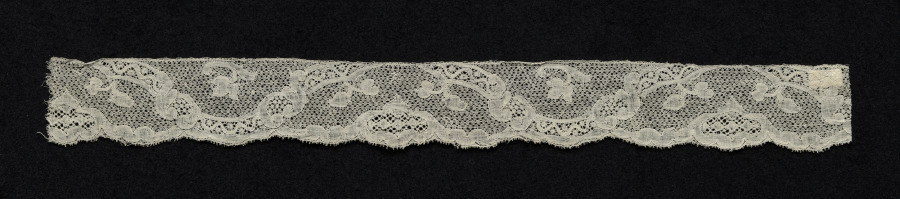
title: Lace Edging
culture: Belgium, Mechelen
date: 1740–60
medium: Linen: bobbin lace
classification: Lace